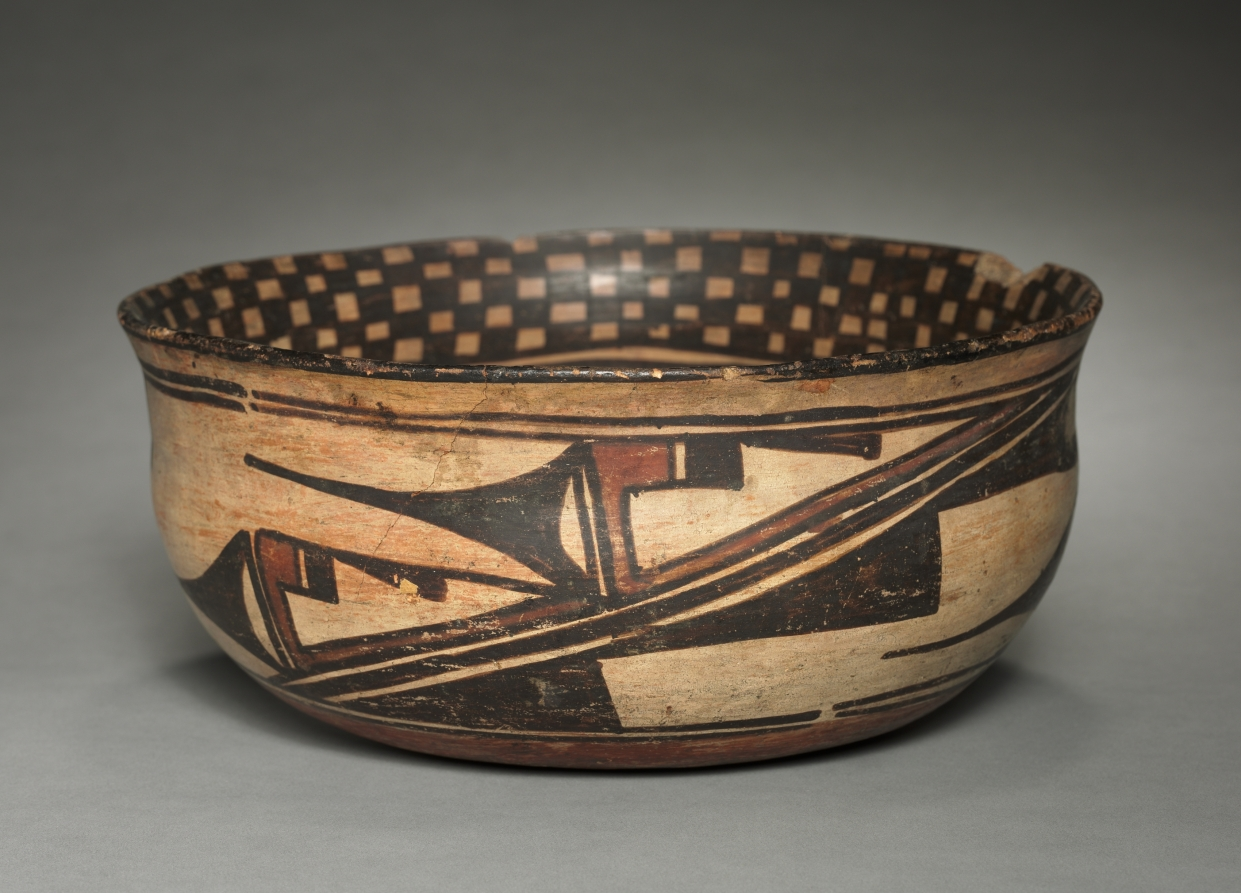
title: Stew Bowl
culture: Southwest,Pueblo, Hopi, Post-Contact Period, 20th century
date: 1870– 1880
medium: ceramic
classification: Ceramic